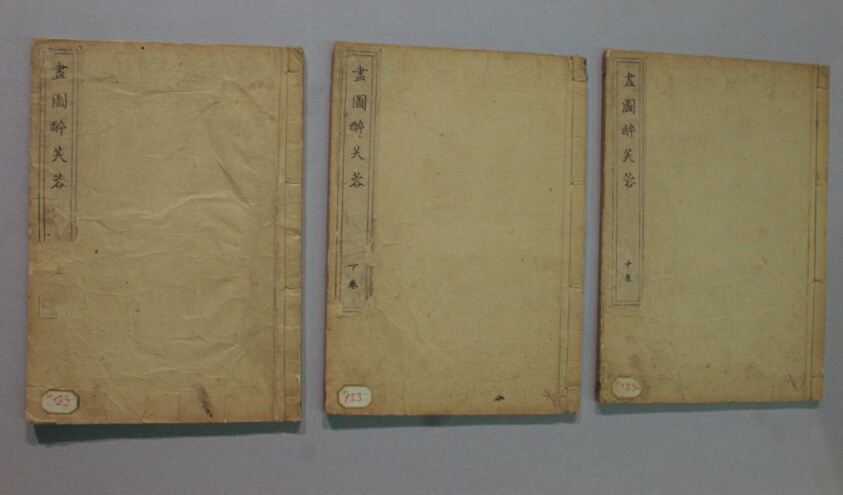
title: Gazu suifuyo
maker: Fuyo Suzuki; Japanese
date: 1809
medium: Woodblock printed books, three volumes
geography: Japan